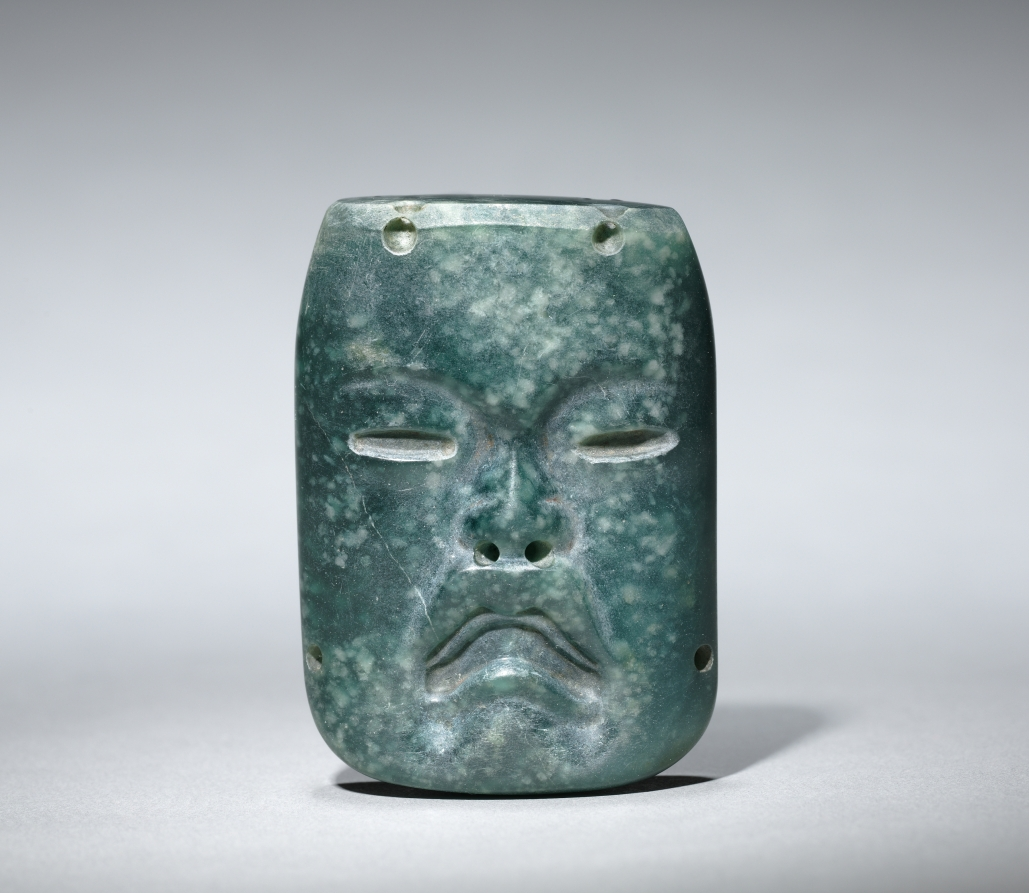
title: Small Mask Ornament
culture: Mesoamerica, Mexico, Olmec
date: c. 900–300 BCE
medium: jadeite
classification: Jade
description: Side and overhead views of a shaft tomb. Photo from Ancient West Mexico, p. 41, The Art Institute of Chicago, 1998